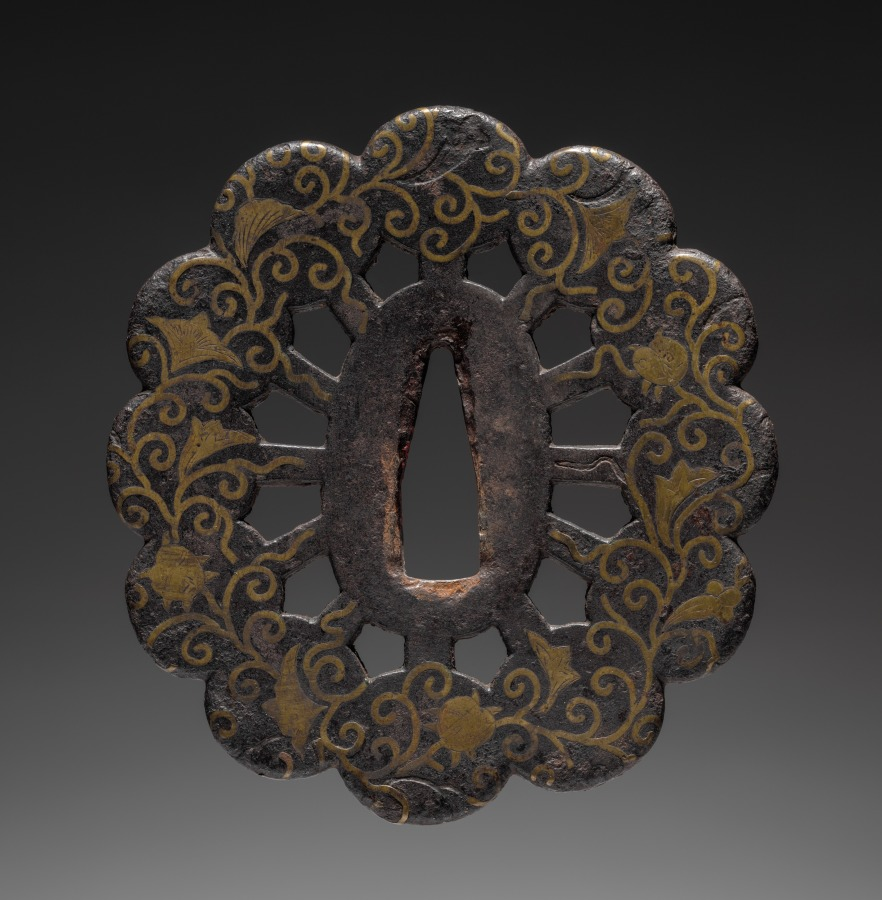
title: Sword Guard (Tsuba)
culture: Japan, possibly Edo period (1615-1868)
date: c. 1615–1868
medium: iron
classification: Arms and Armor